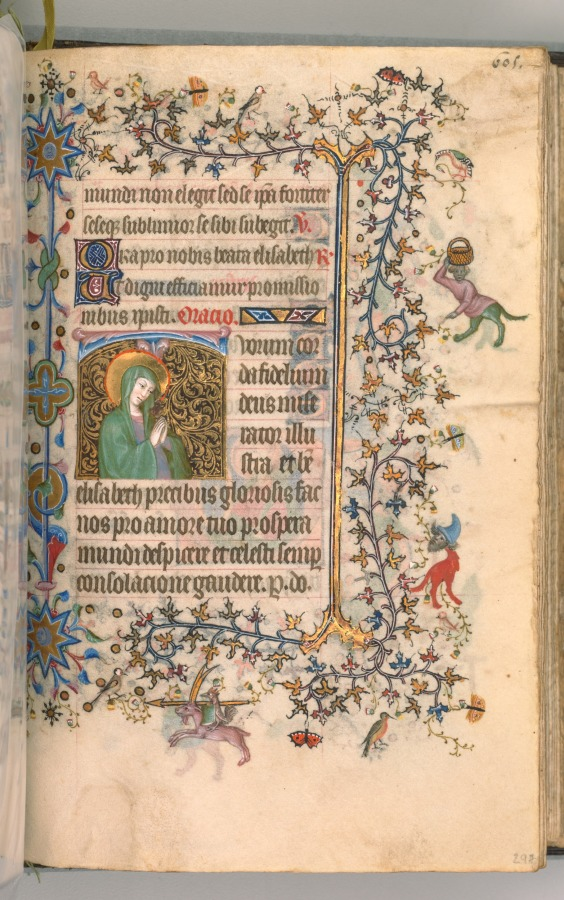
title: Hours of Charles the Noble, King of Navarre (1361-1425): fol. 297r, St. Elizabeth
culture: France, Paris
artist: Master of the Brussels Initials and Associates (French)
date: c. 1405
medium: ink, tempera, and gold on vellum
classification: Bound Volume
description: This precious volume was obviously highly prized by its owner, the French-born King of Navarre, who had his coat of arms painted on no less than twenty folios. Rather than directly commissioning this manuscript from a specific workshop, it seems that Charles the Noble acquired his book of hours -- perhaps ready-made for the luxury market -- while on a trip to Paris in 1404-05. A collaborative effort, six painting styles are evidenced within the pages of this codex, those of two Italians, two Frenchmen, and two Netherlanders. The painter who was responsible for the planning and decoration of the book, and who produced seventeen of the large miniatures, was a Bolognese artist known as the Master of the Brussels Initials. His principal assistant, responsible for most of the borders, was a Florentine who signed his name "Zecho" da Firenze on folio 208 verso.